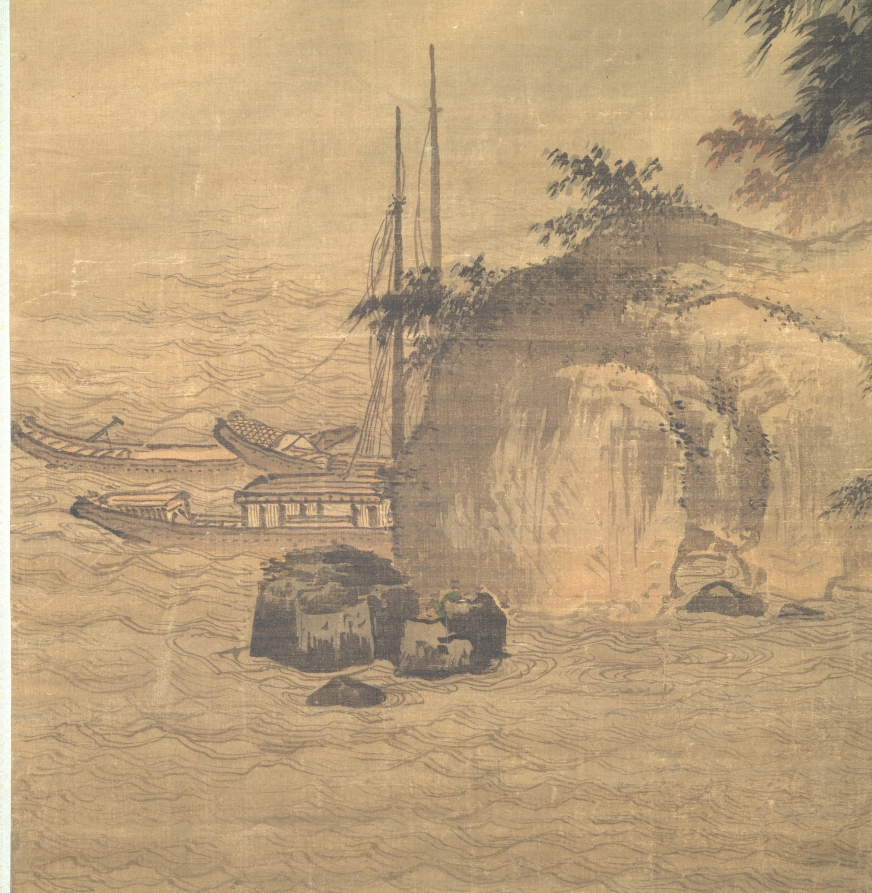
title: River Village in a Rainstorm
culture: China, Ming dynasty (1368–1644)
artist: Lu Wenying (Chinese)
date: c. 1480–1507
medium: Hanging scroll; ink and slight color on silk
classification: Painting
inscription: 呂文英 [印] 日近清光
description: In this scene, windswept rain pelting a village captures the power of nature in a masterful composition. Lü Wenying from Zhejiang served as a court painter during the Hongzhi era (1488–1505). Hardly known, with few remaining works, he is considered a Zhe school painter who followed the style of the Southern Song academy. Zhe school painters, named after the province of Zhejiang, transformed the poetic scenery of the Southern Song artists into dramatic, large-scale views. Active in the same region with frequent monsoon rains in the summer season, artists were familiar with outbreaks of rain and storms.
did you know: A young boy peeks out a window perhaps viewing the two people struggling through the rain.